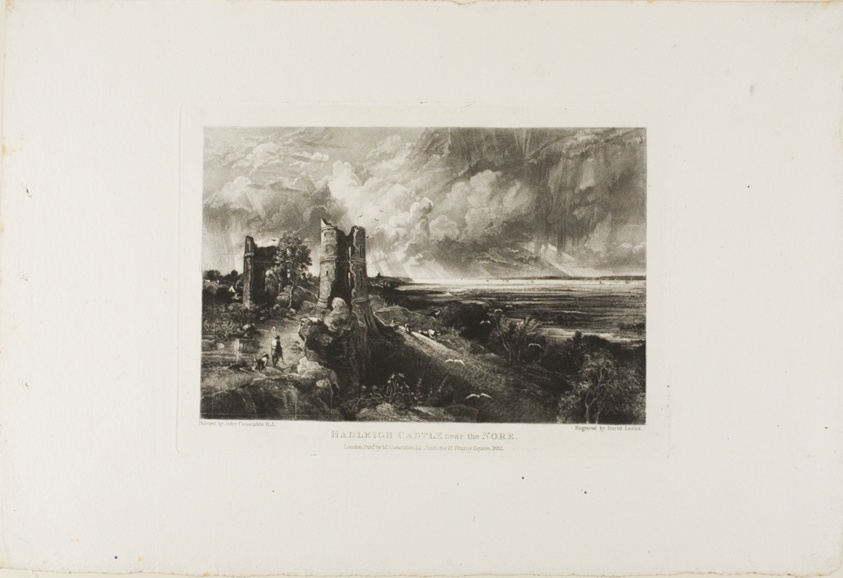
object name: Print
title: Hadley Castle, Near the Nore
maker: after David Lucas; English, 1802-1881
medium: Mezzotint on paper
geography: England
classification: mezzotint; print; prints and drawing